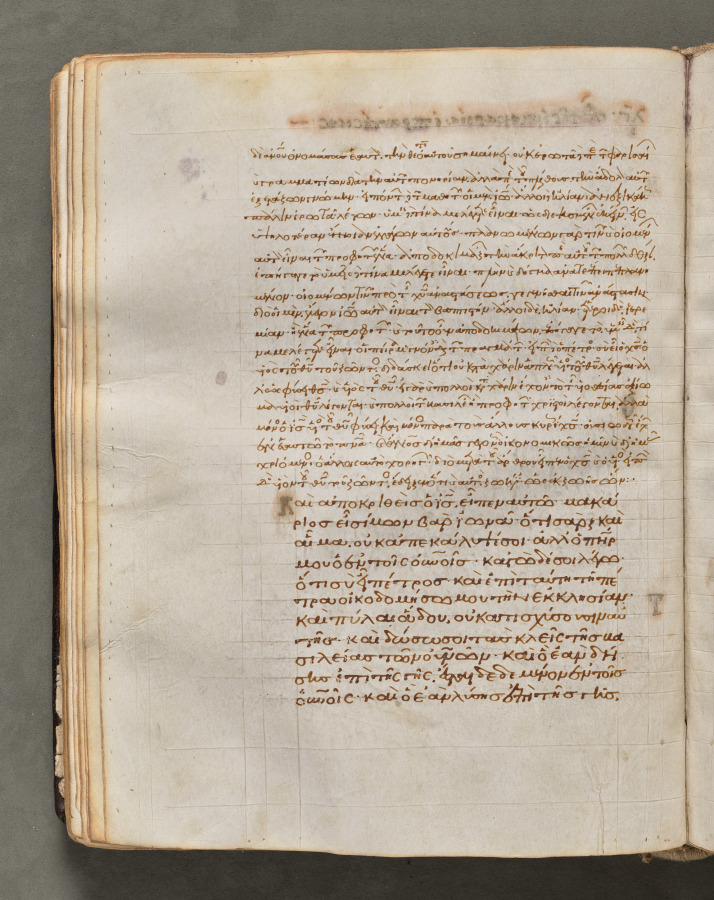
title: Text, folio 73 (verso), from a Gospel Book with Commentaries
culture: Byzantium, Constantinople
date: c. 1000–1100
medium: ink, tempera, and gold on vellum; leather binding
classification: Bound Volume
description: Each of the four gospels in this book opens on a page with brilliantly illuminated borders depicting the author of the text as well as birds-principally peacocks, symbols of the immortality of the soul-and fountains, representing the fountain of life and the salvation of the soul. This volume consists of 428 leaves with texts in Greek. Its level of sophistication suggests that it was probably written and decorated in a monastery in Constantinople.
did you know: Gospel Books were carried in procession through Byzantine churches.